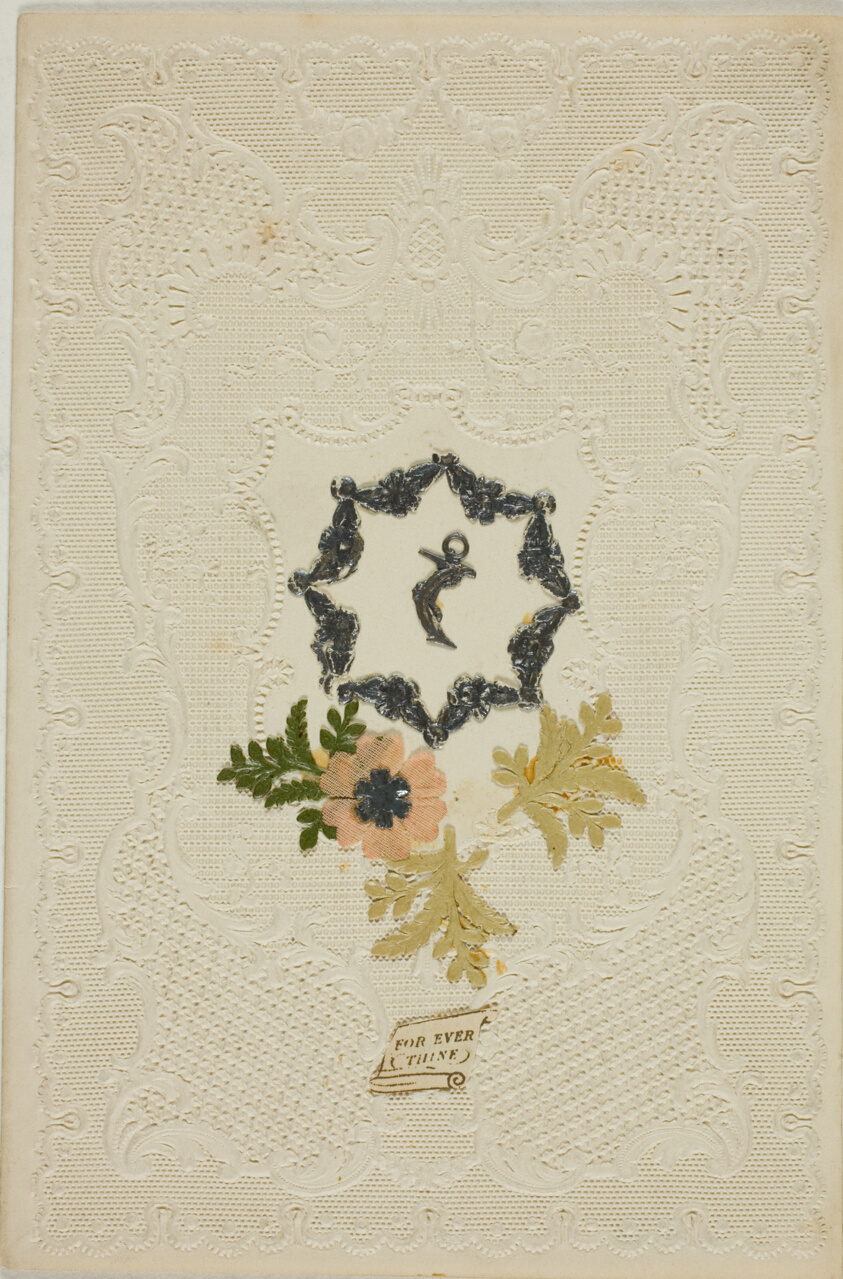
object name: Drawing and Watercolor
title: For Ever Thine (Valentine)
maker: Unknown Artist; English, 19th century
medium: Collaged elements on embossed ivory wove paper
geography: England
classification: valentine; prints and drawing; paper